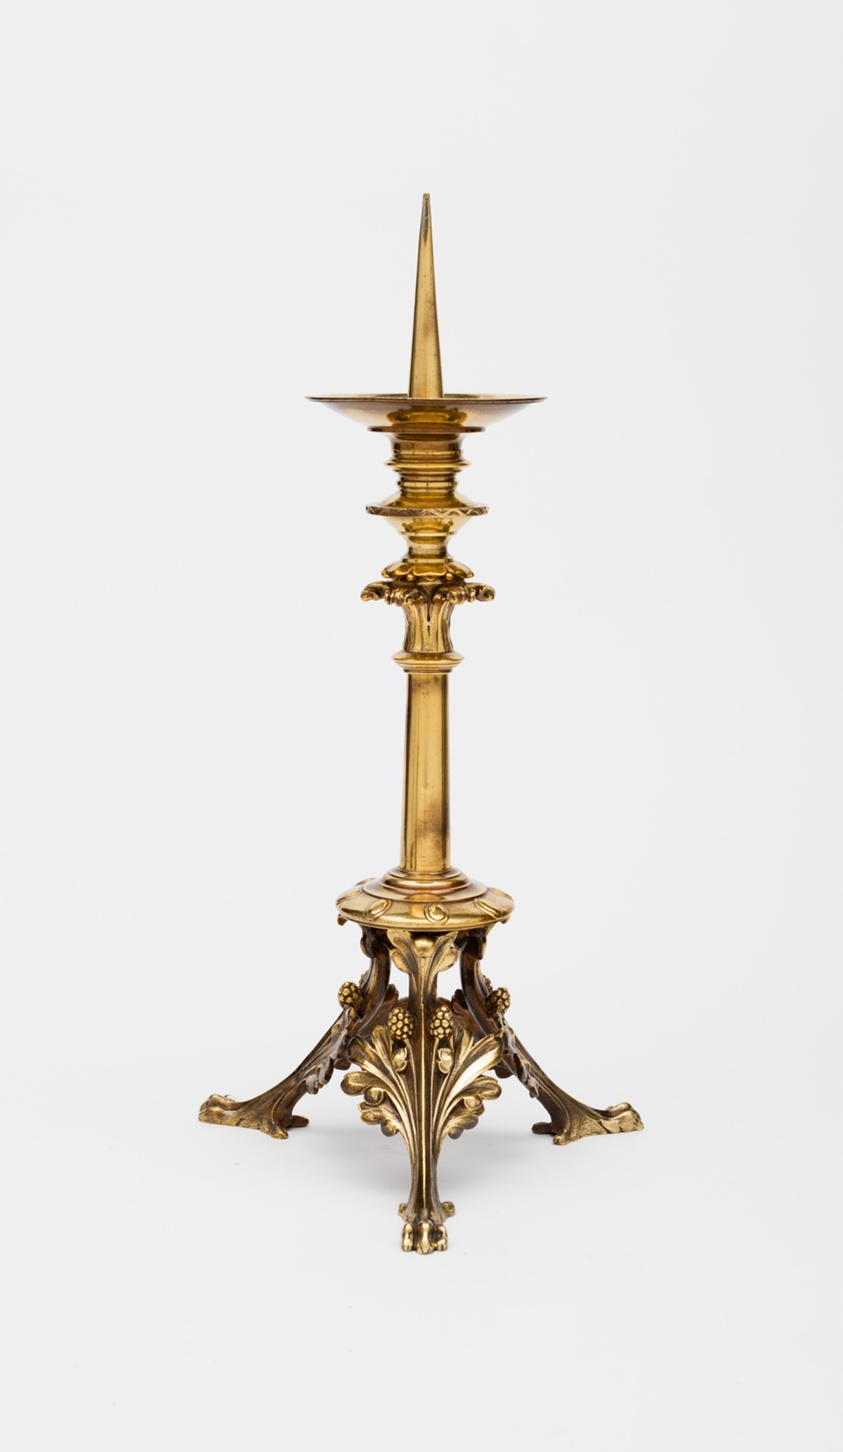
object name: Metalwork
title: Pair of Altar Candlesticks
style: gothic revival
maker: Eugène Emmanuel Viollet-le-Duc; French, 1814–1879; Made by Placide-Benoît-Marie Poussielgue-Rusand; French, 1824–1889; Paris, France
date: 1862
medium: Gilded cast bronze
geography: Paris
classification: altar candlesticks; candlesticks; candleholder; metalwork